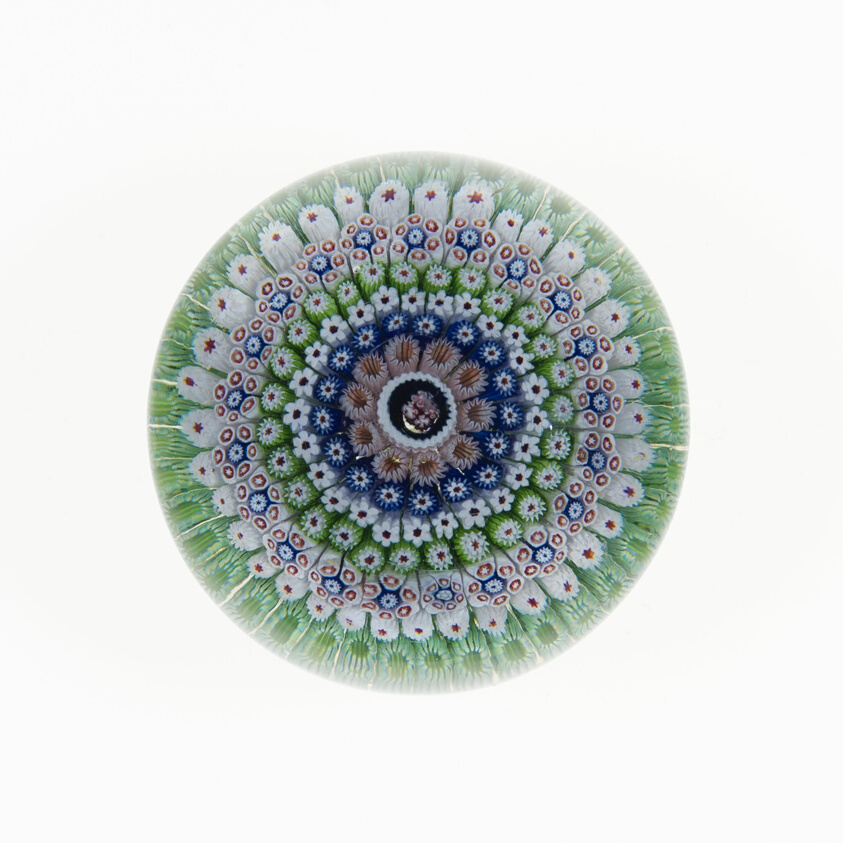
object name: Glass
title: Paperweight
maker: Saint-Louis Glassworks (Cristalleries de Saint-Louis); Lorraine, France, founded 1586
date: c. 1845/60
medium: Glass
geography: Saint-Louis-lès-Bitche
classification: paperweight; glass